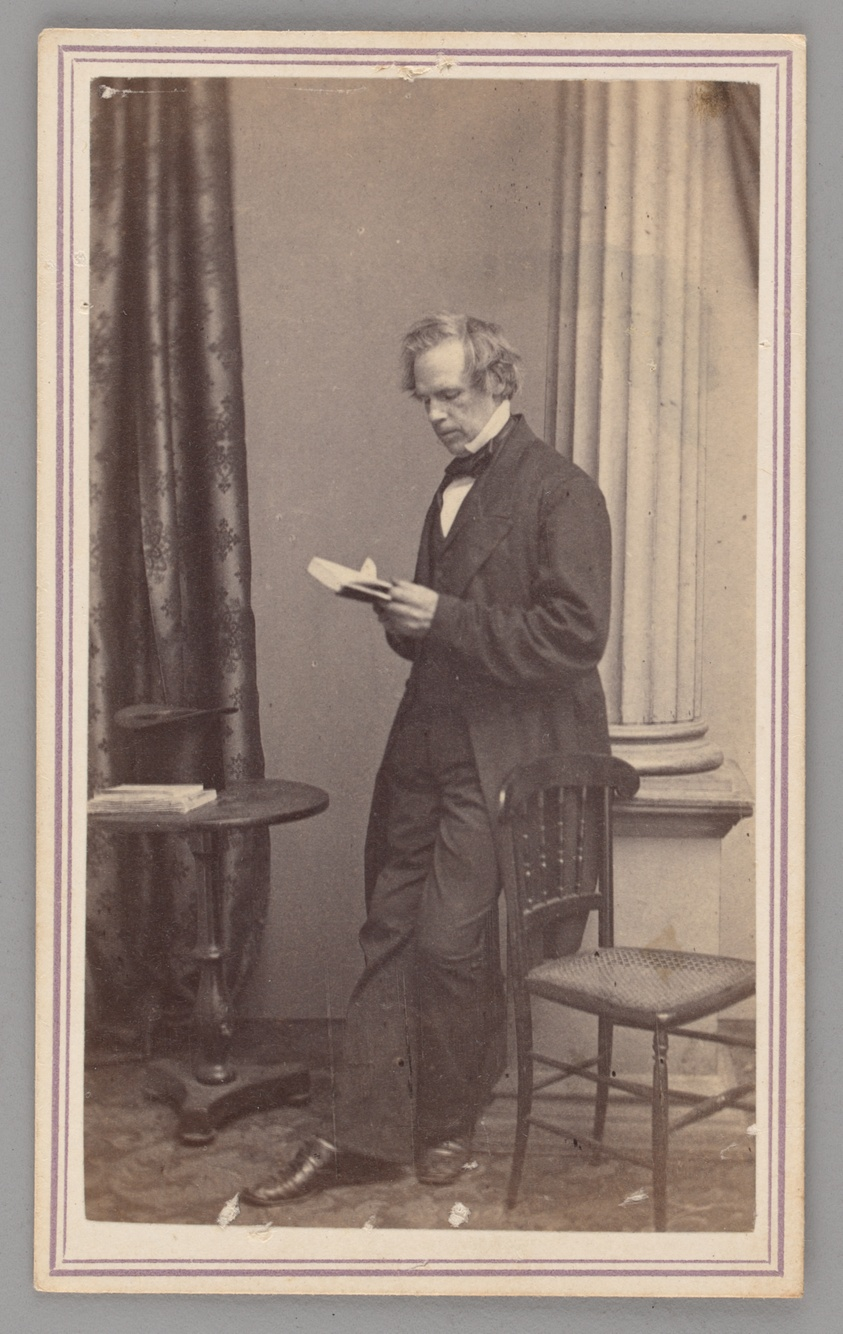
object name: Photograph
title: Untitled (Self-Portrait of Josiah Johnson Hawes)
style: 19th century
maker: Albert Sands Southworth (American, 1811-1894); and Josiah Johnson Hawes (American, 1808-1901)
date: 1865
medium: Albumen print, carte-de-visite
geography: United States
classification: portrait; photograph; photographic process; photography; portrait; albumen print from collodion negative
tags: lundberg collection, portraits, portraits: male subject, men, Male, portrait